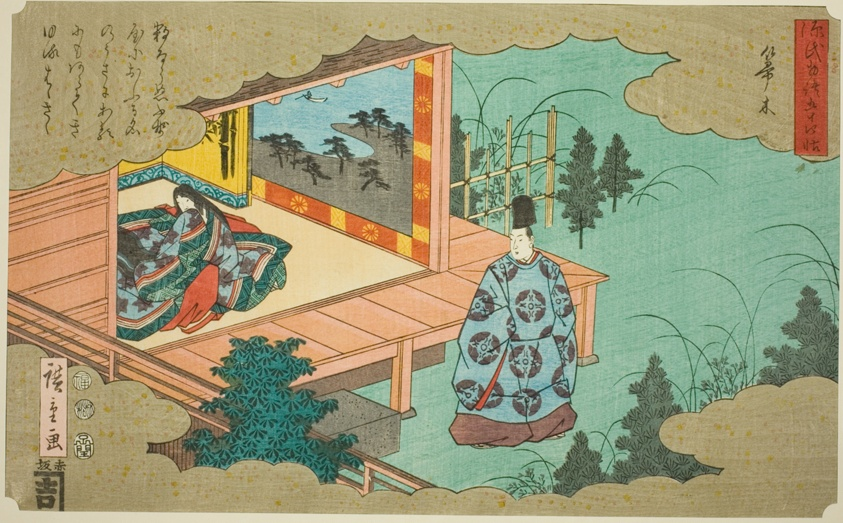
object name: Print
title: Hahakigi, from the series "Fifty-four Chapters of the Tale of Genji (Genji monogatari gojuyonjo)"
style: Japanese (culture or style)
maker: Utagawa Hiroshige 歌川 広重; Japanese, 1797-1858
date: 1852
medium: Color woodblock print; oban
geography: Japan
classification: woodblock print; print; asian art